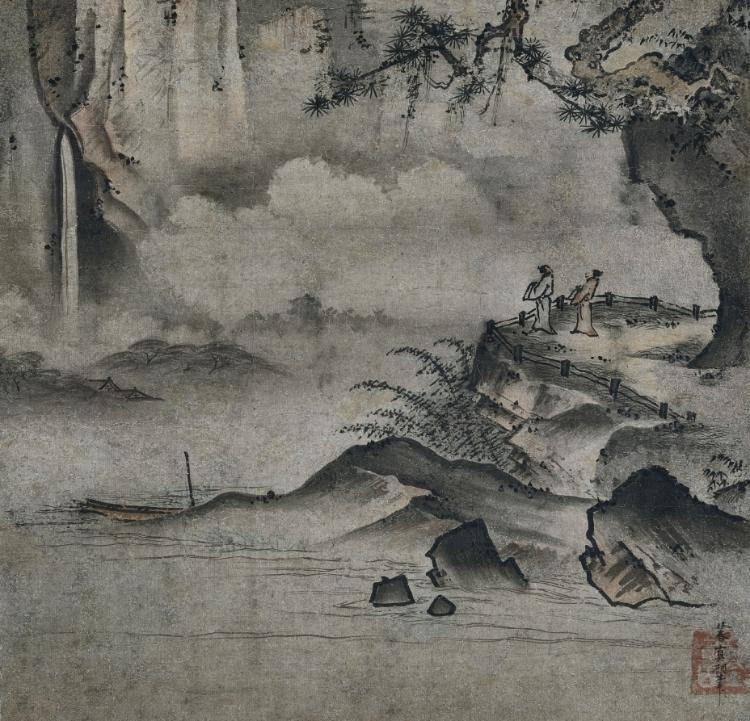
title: Gazing at a Waterfall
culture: Japan, Muromachi period (1392–1573)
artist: Sōami (Japanese, d. 1525)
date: early 1500s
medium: Album leaf mounted as a hanging scroll; ink and slight color on paper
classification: Painting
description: Chinese poet Li Bai’s (701–762) poem “Gazing at a Waterfall on Mount Lu” is about experiencing the vastness of the galaxy in relationship to one’s own being. Japanese Zen monk-poet Keijo Shūrin (1440–1518) identified Li’s poem as the inspiration for Japanese painter Geiami’s (1431–1485) work Gazing at a Waterfall, in the collection of the Nezu Museum, which features sharp brushstrokes and bright colors. In contrast, this album leaf’s painter, Geiami’s son Sōami, took a more delicate approach to the theme. The waterfall and the pair watching it frame the mist rising from the water at the center of the image.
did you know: The setting of this painting is historical China, as evidenced by the clothing and hairstyles of the two people appreciating the waterfall.